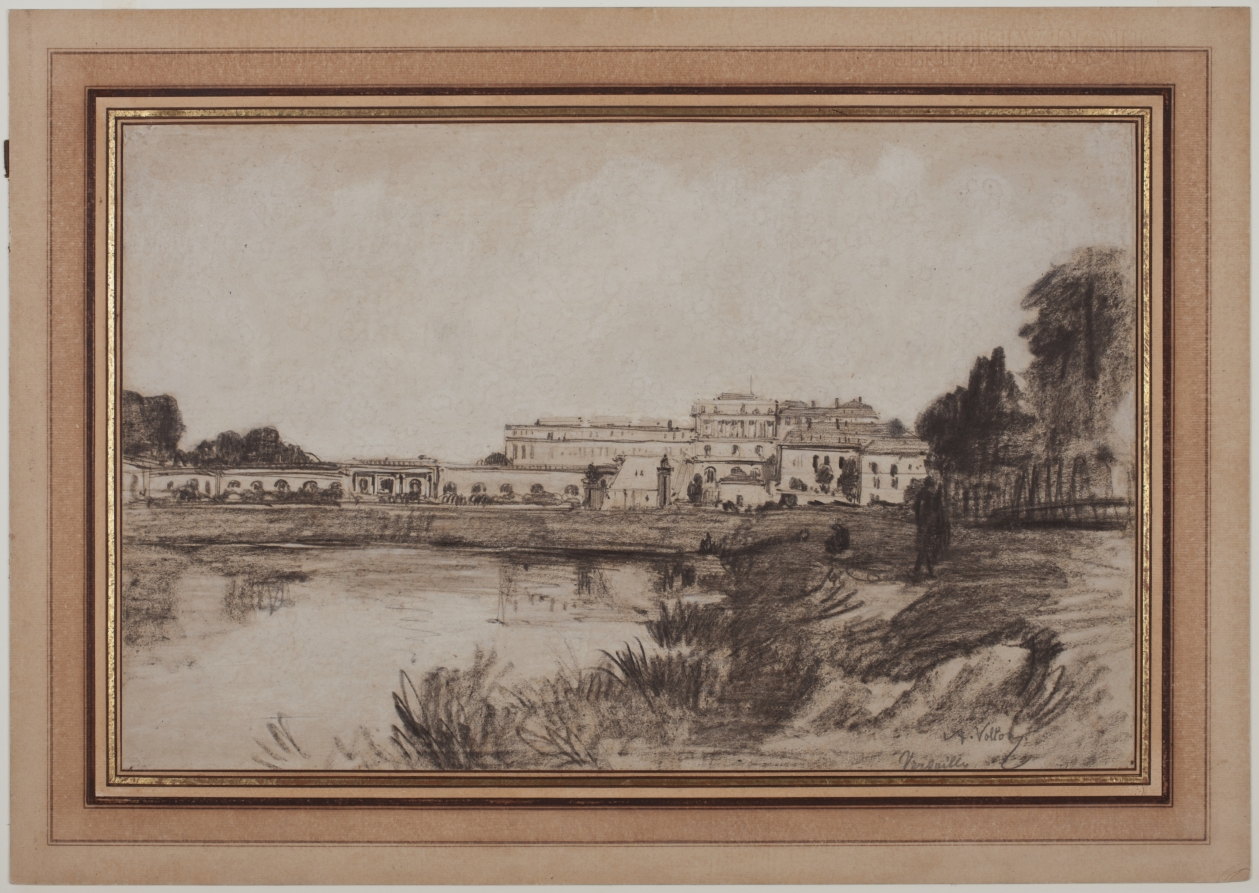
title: View of Versailles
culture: France, 19th century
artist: Antoine Vollon (French, 1833–1900)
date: 1800s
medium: black and white chalk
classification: Drawing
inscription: Signed and inscribed, lower right in graphite: A. Vollon/Versailles